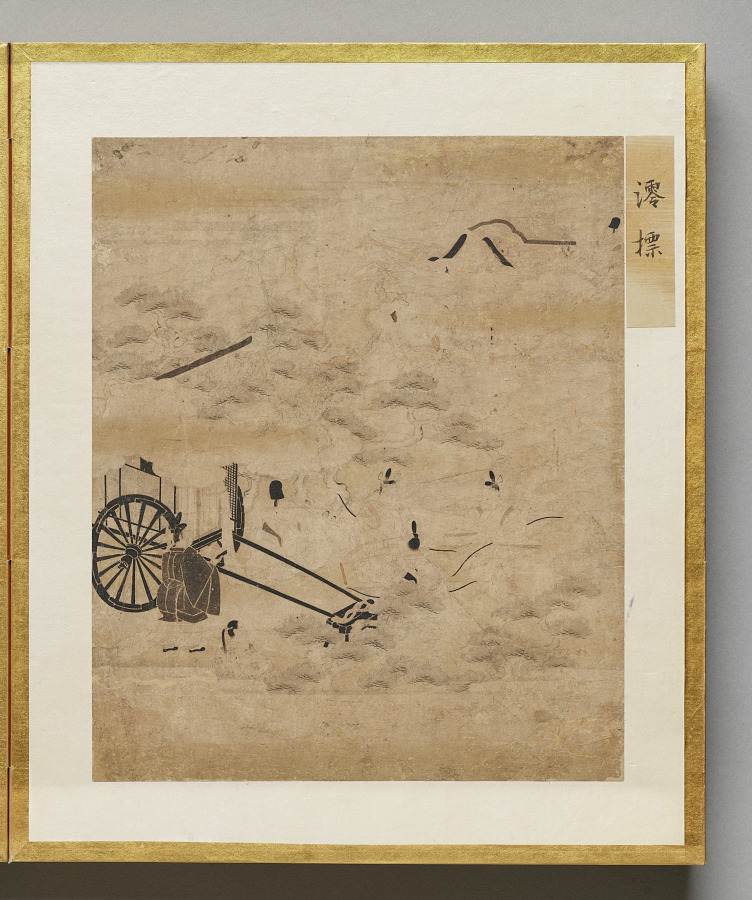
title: Channel Buoys from Album of Illustrations for the Tale of Genji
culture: Japan, Edo period (1615–1868)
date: 1600s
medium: painting in an accordion-style album; ink, light color, and gold on paper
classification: Bound Volume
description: This album contains illustrations for the classic literary work the Tale of Genji, authored in the 1000s by Murasaki Shikibu, an aristocrat of the Heian period (794–1185) court. The scenes are painted in the “white drawing” (hakubyō) mode, in which a fine ink line is used to depict figures and spaces with great subtlety, punctuated only occasionally by traces of red pigment for a character’s lips, a detail of a garment, or a decorative element. These two scenes illustrate episodes from the chapters “Thin Veil of Cloud” (Usugumo) and “Barrier Gate” (Sekiya).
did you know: The illustrations are identified by chapter title in cartouches to the upper right of the paintings.